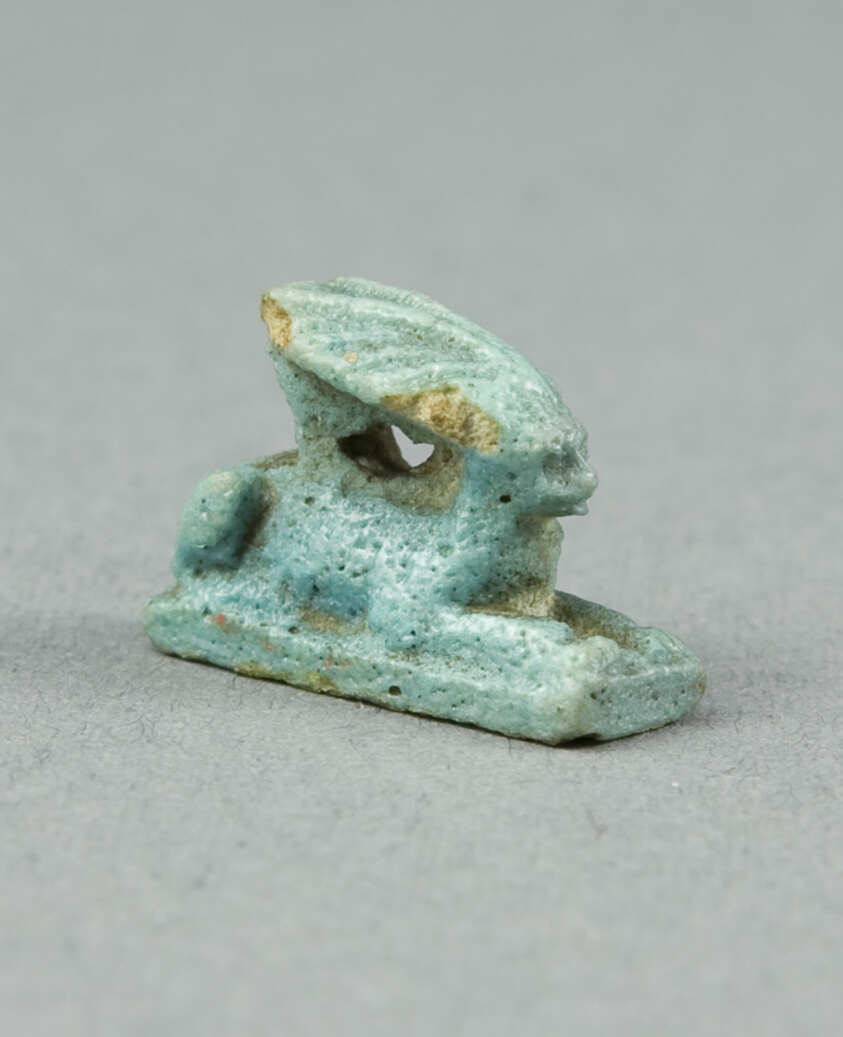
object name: Costume and Accessories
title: Amulet of a Hare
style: egyptian, ptolemaic, late period (egyptian), ancient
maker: Egyptian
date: Late Period–Ptolemaic Period (7th–1st centuries BCE)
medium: Faience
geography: Egypt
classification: amulet; jewelry; ceramics; ancient art; costume; faïence (composite material)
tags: hares, animals